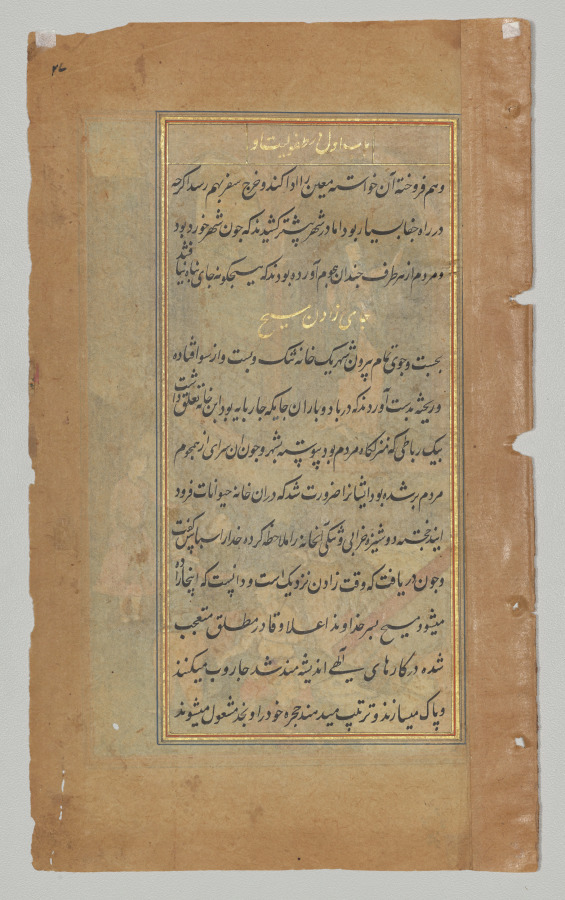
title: Text page from a Mirror of Holiness (Mir’at al-quds) of Father Jerome Xavier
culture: Mughal India, Allahabad, made for Prince Salim (1569–1627)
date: 1602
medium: Ink and gold on paper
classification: Manuscript